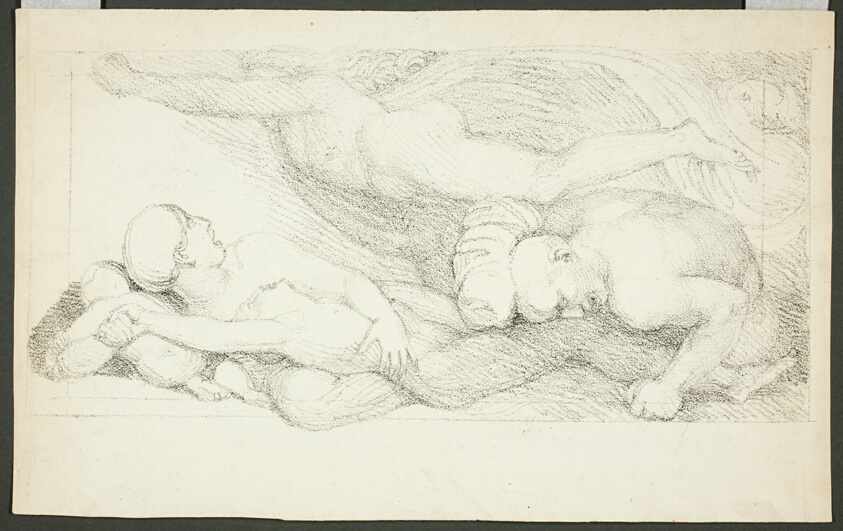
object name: Print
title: Figures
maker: John Flaxman (English, 1755-1826)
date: c. 1817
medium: Lithograph on ivory wove paper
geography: England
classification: lithograph; print; prints and drawing